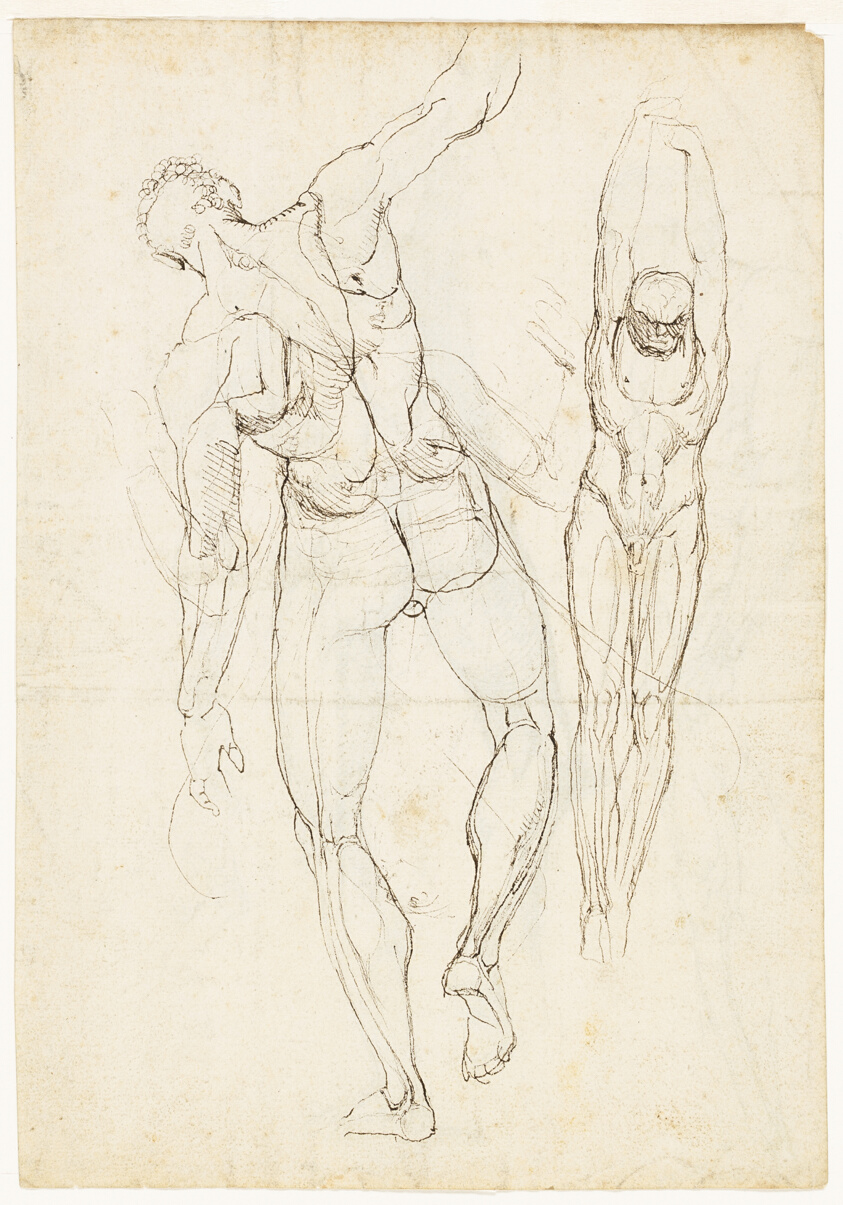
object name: Drawing and Watercolor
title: Figure Studies (recto and verso)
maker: Henry Fuseli (Swiss, active in England, 1741-1825)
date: c. 1800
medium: Pen and brown ink (recto and verso) on cream laid paper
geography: England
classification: pen and ink drawings; drawings (visual works); prints and drawing; paper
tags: zigzags